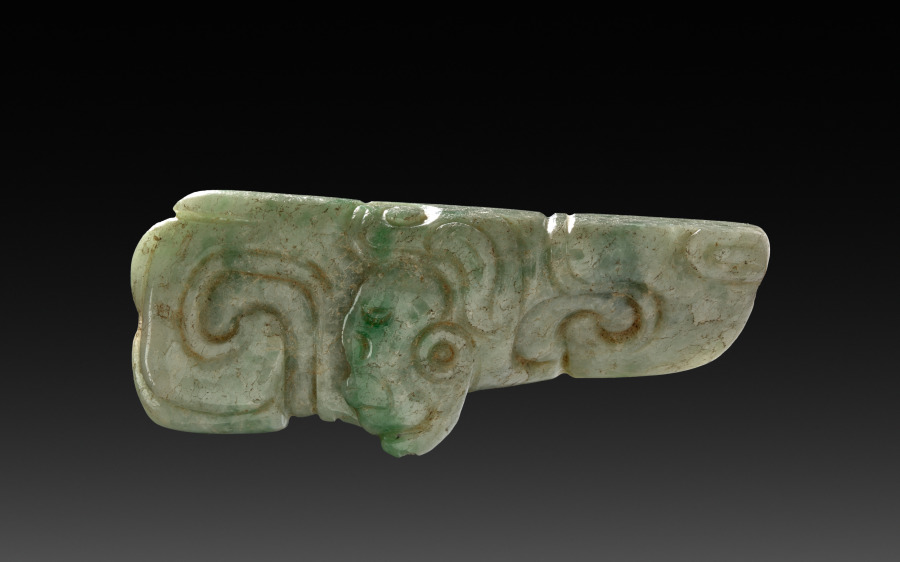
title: Pendant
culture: Maya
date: 250–900 CE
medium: jadeite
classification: Jade